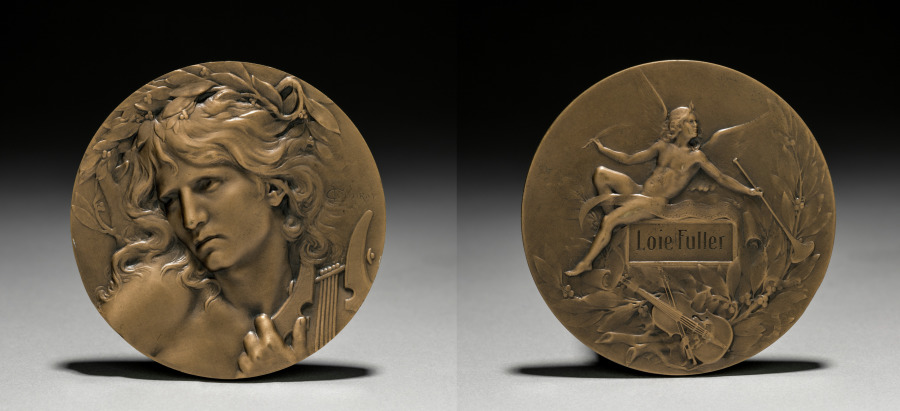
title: Medal Presented to Loïe Fuller by the French Government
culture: France, 19th century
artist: Marie Alexandre Lucien Coudray (French, 1864–1932)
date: 1900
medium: bronze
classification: Metalwork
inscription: on obverse: L. Coudray. on reverse: Loie Fuller. Inscribed on edge: "Bronze" with an unidentified emblem.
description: A temporary theater on the grounds of the 1900 Exposition Universelle was devoted to Loïe Fuller, who by that time had become a cultural icon. The theater’s interior was hung with draperies onto which a kaleidoscope of colors shone from stained glass windows and hidden lamps, evoking the diaphanous veils of her costumes. In the foyer was a gallery of paintings, drawings, and sculpture all depicting the dancer. Coudray’s medal, Orpheus at the Entrance to the Underworld, was struck to commemorate the world’s fair. This example of the famous Art Nouveau medal was engraved as a gift to Loïe Fuller.